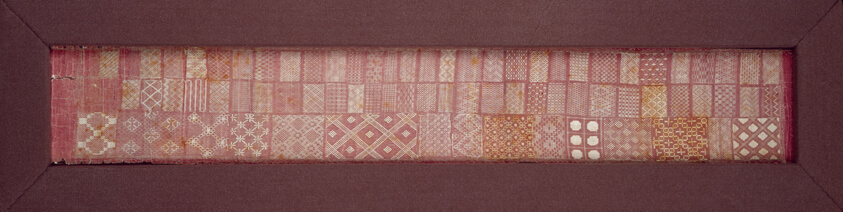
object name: Textile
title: Sampler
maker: Probably France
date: 1750/1800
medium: Silk, plain gauze weave; embroidered in checker filling, cross, darning, four-sided, herringbone, open buttonhole filling, overcast, satin, and wave stitch ground stitches; darned wheels (lacis)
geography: France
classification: textile; needlework (visual works)